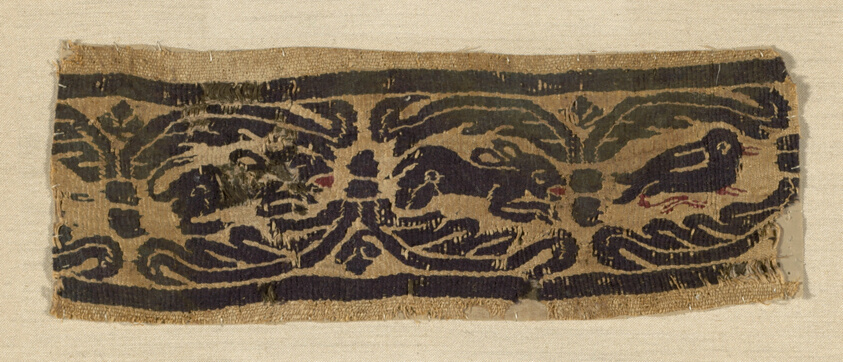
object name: Textile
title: Border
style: roman period (egyptian)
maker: Coptic (Egypt)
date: Roman period (30 B.C.– 641 A.D.), 4th/6th century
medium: Linen and wool, slit tapestry weave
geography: Egypt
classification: textile; weaving